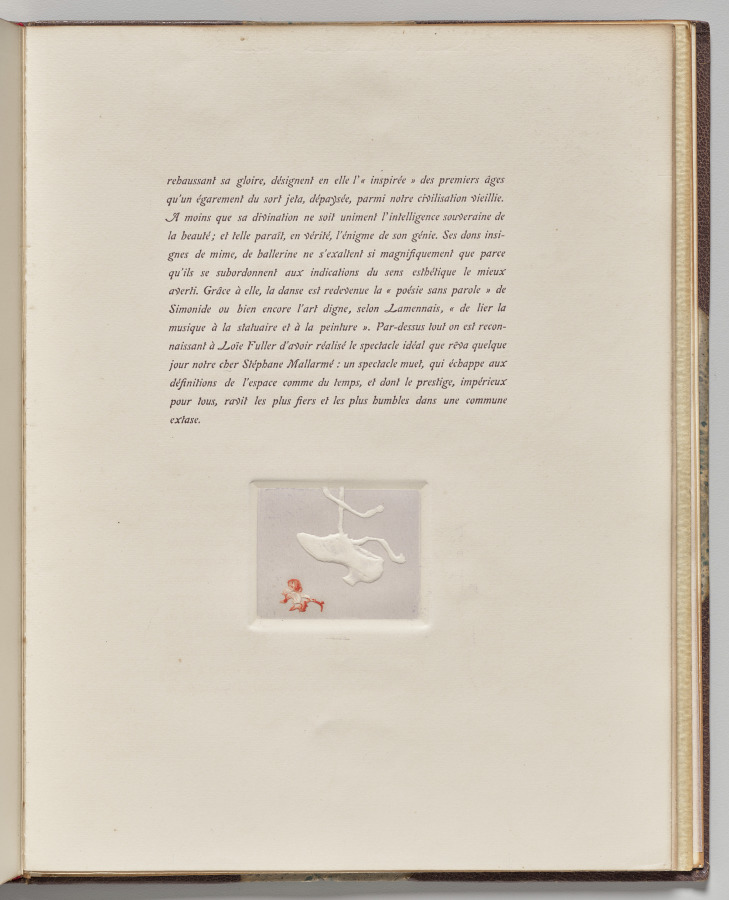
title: Shoe Suspended from a Ribbon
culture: France, early 20th Century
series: La Loïe Fuller, by Roger Marx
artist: Pierre Roche (French, 1855–1922)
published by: Les Cents Bibliophiles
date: 1904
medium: gypsograph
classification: Bound Volume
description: Although best known as a sculptor, Roche was a versatile and prolific artist who worked in many mediums. Loïe Fuller, the pioneer of modern dance who took Paris by storm in 1892, was one of his favorite subjects. He portrayed her in clay, bronze, marble, plaster, and in a series of gypsographs that illustrated an essay by the art critic Roger Marx. The book was described as "a precious monument to Loïe Fuller."